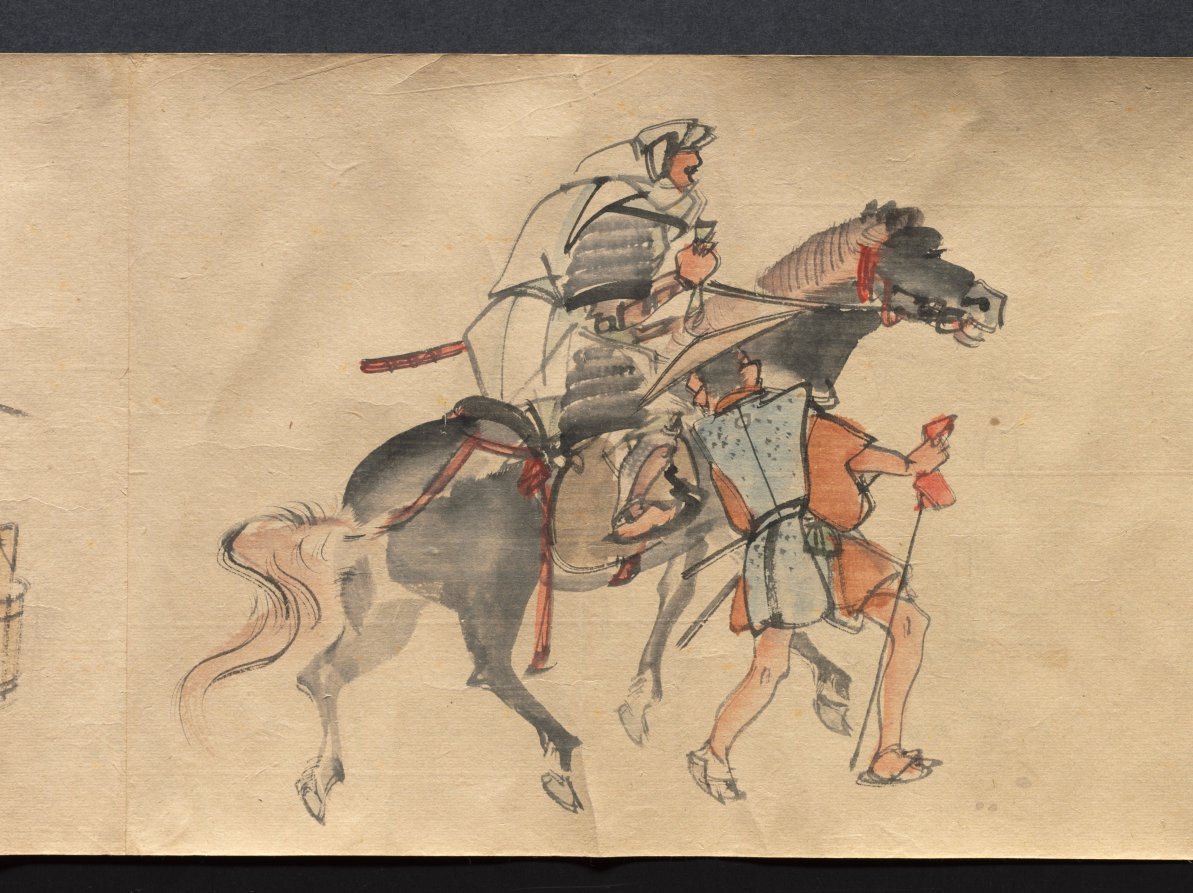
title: Festival Scenes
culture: Japan, Edo period (1615–1868)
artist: Suzuki Nanrei (Japanese, 1775–1844)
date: c. 1795–1844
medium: handscroll; ink and color on paper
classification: Painting